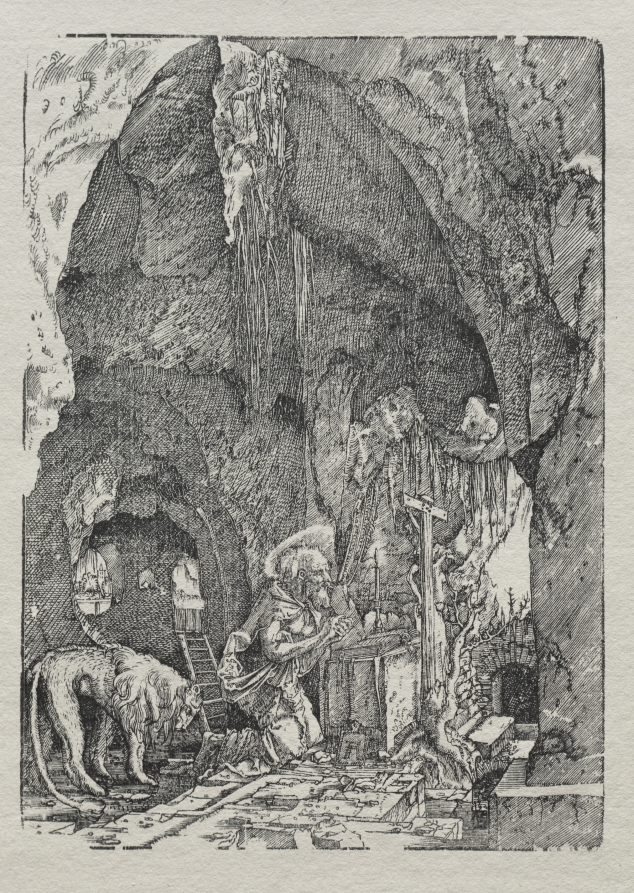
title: St. Jerome in the Cave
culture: Germany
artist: Albrecht Altdorfer (German, c. 1480–1538)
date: c. 1513–15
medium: woodcut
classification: Print